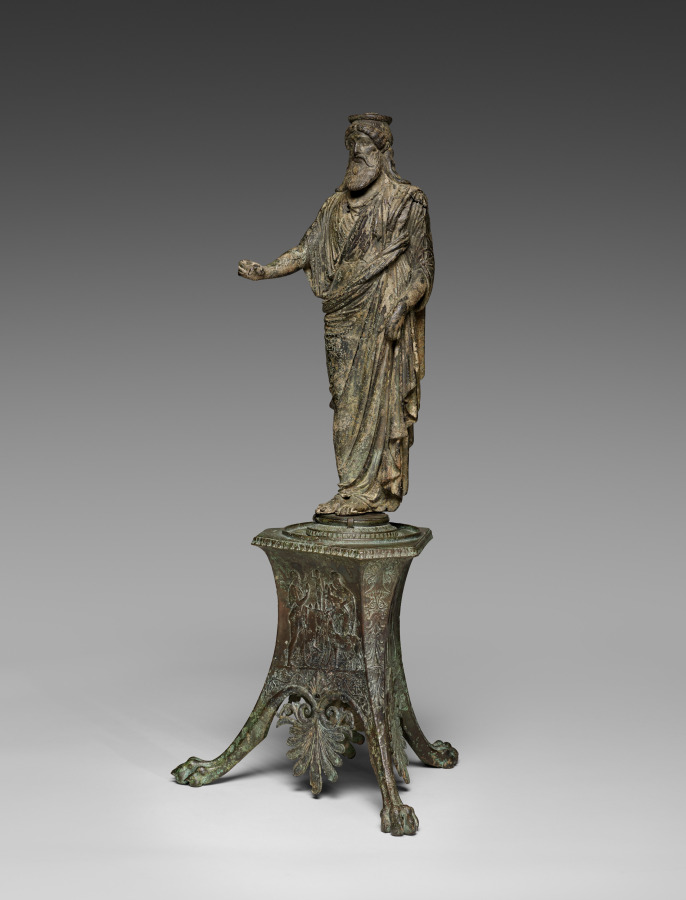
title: Statuette of Dionysos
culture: Italy, Roman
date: 50 BCE–50 CE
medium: bronze and silver and traces of gilding, hollow cast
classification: Sculpture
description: This bronze figure of Dionysos, the god of wine, theater, and the mysteries, is presented in a style recalling Archaic Greek art, most noticeably in his stiff pose and trimmed beard. The more naturalistic folds of his garment speak to a later date, in the Roman period. The disk attached at the top of the head suggests that this figure was once part of an ornate piece of furniture, perhaps a stand or support. In his right hand, the god likely held a kantharos or other attribute. He would have been further embellished with inlaid copper (lips), silver (whites of eyes), and perhaps gilding (garment).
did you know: Over his long, thin garment, Dionysos wears an animal skin, fastened on his left shoulder.